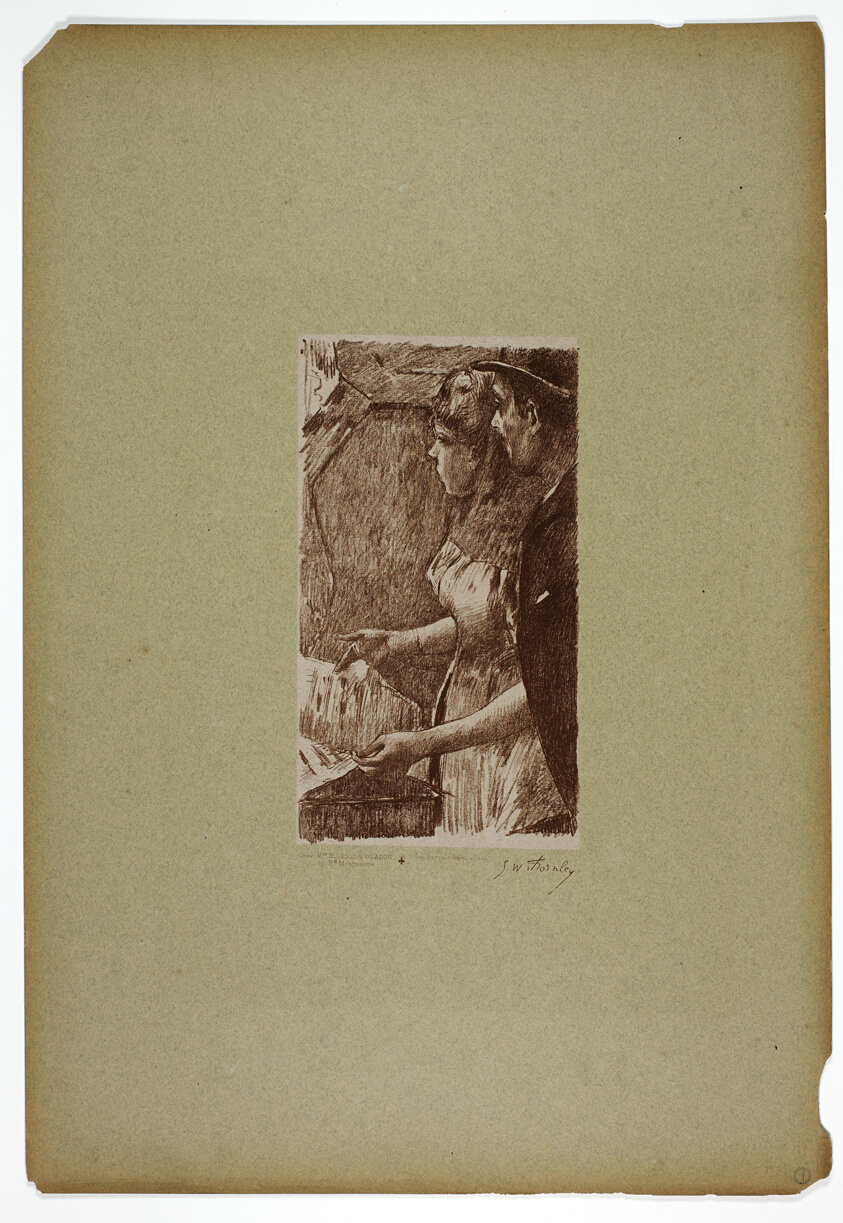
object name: Print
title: Singer Waiting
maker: Georges-William Thornley (French, 1857-1935); after Edgar Degas (French, 1834-1917); printed by Atelier Becquet (French, 19th century); published by Boussod, Valadon, & Company (French, 18th-19th century)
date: 1889–90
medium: Lithograph on paper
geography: France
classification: lithograph; print; prints and drawing